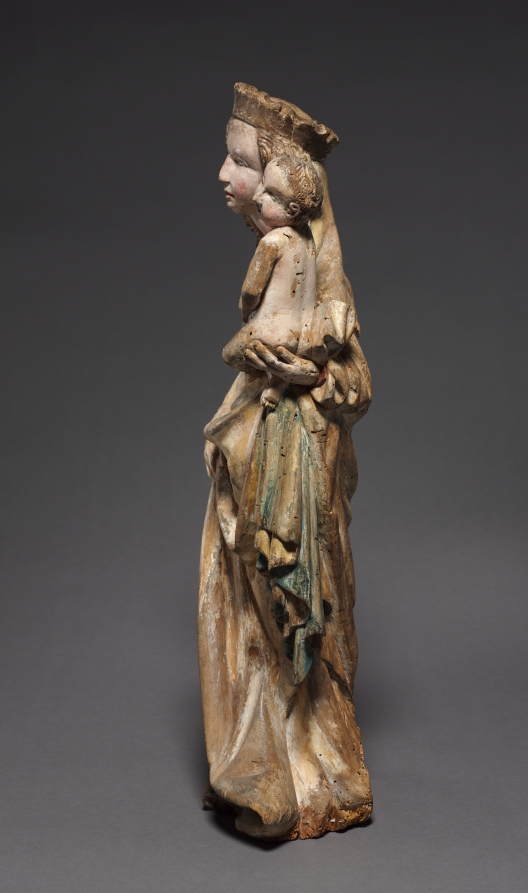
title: Madonna and Child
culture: Bohemia, vicinity of Freistadt, 15th century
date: c. 1400–1410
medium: lindenwood with polychromy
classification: Sculpture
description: This sculpture belongs to a type known as a Schöne Madonna or "Beautiful Virgin," popularized in central Europe during the late 1300s and early 1400s. The Virgin’s stance adheres to an S-curve as she stands with one leg straight and the other slightly bent at the knee. Her body is hidden beneath long, voluminous, draping garments. These so-called Beautiful Madonnas are among the most popular creations of Bohemian art and were in high demand for churches and private veneration.